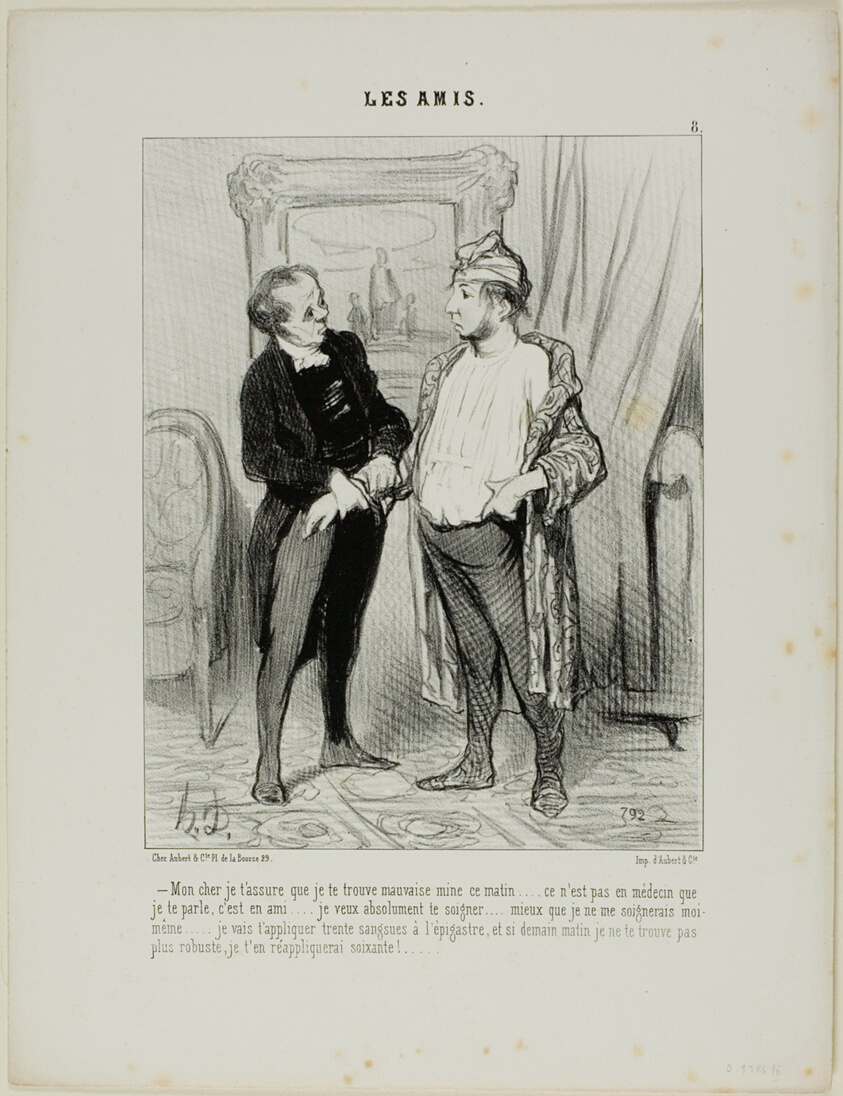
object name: Print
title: “- My dear friend, you really don't look very well this morning. I am not speaking to you as a doctor, but as a friend. I must insist in treating you.... better than I would treat myself. I am going to apply 30 leeches to your belly and if by tomorrow you have not improved, I'll apply another sixty,” plate 8 from Les Amis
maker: Honoré Victorin Daumier; French, 1808-1879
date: 1845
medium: Lithograph in black on white wove paper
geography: France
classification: lithograph; print; prints and drawing